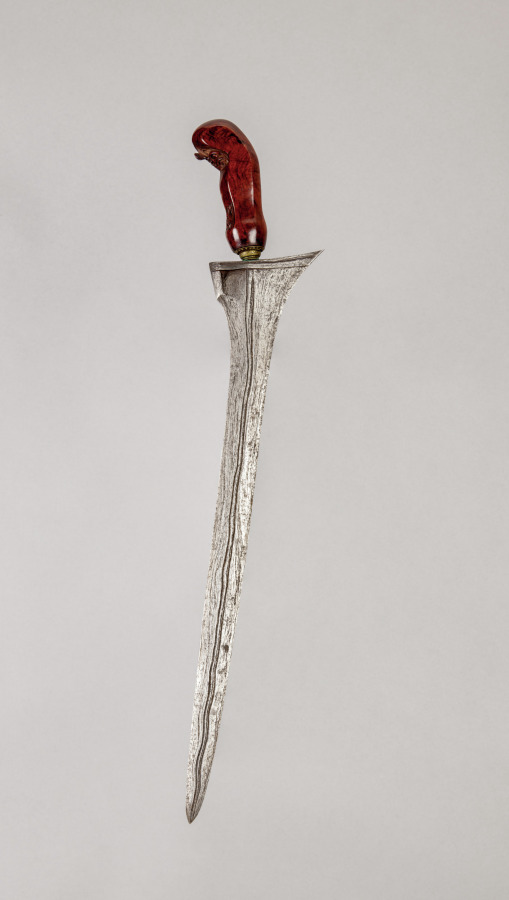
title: Sword (Kris)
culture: Java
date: 1800s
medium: iron with carved wooden handle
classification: Arms and Armor